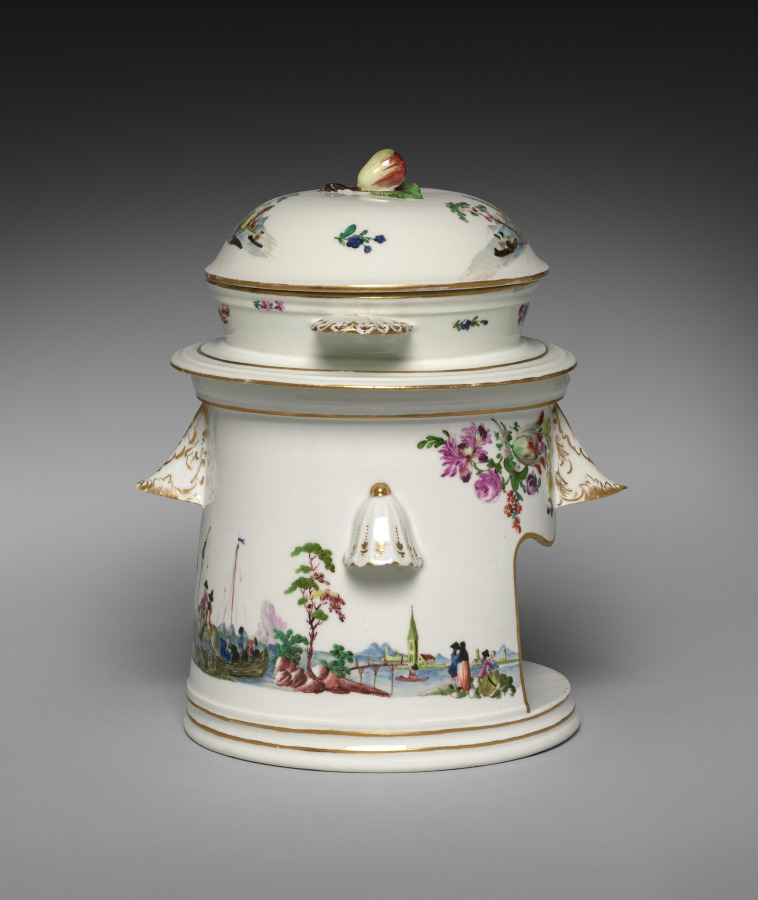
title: Food Warmer (Veilleuse)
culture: Germany, Nymphenburg, 18th century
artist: Nymphenburg Porcelain Factory (German, founded 1747)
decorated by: probably by Georg Christoph Lindemann (German)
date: c. 1758–1760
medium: porcelain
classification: Ceramic